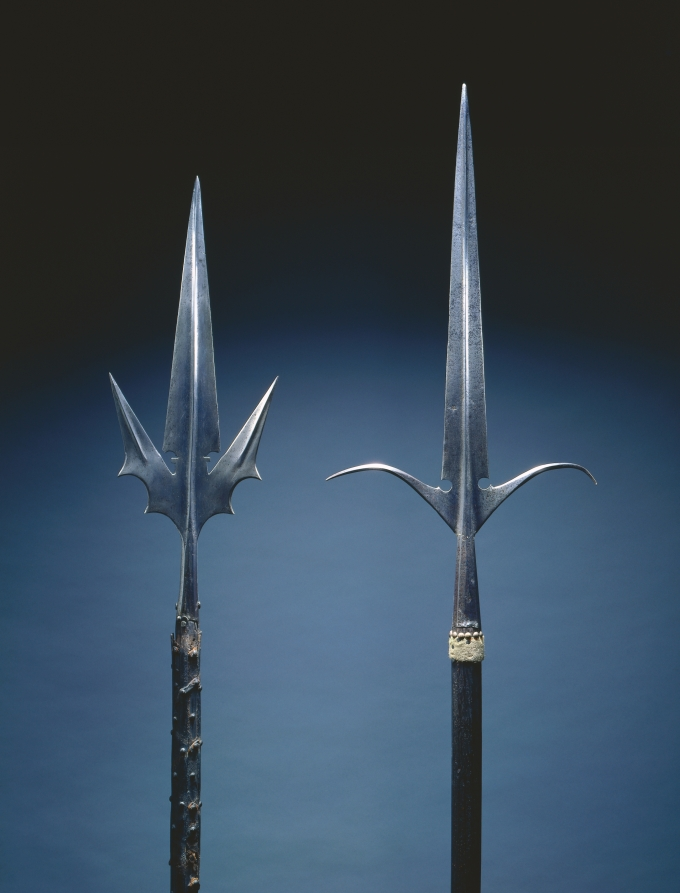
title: Corsèque (Chauve-Souris)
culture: North Italy, 16th century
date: c. 1530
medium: steel; round wood haft with leather straps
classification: Arms and Armor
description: The corsèque is a pole arm with a symmetrical three-pronged head consisting of a central double-edged blade and two sharp, upturned wings. The side blades served several functions: as guard to protect the soldier's hand when a thrust was delivered with the central blade; as a hook for unseating a mounted opponent; and to trip the opponent's horse. The corsèque was used mostly in Italy and France from the 1400s to the early 1600s.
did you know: The corsèque is said to have originated in Corsica, from where it takes its name.